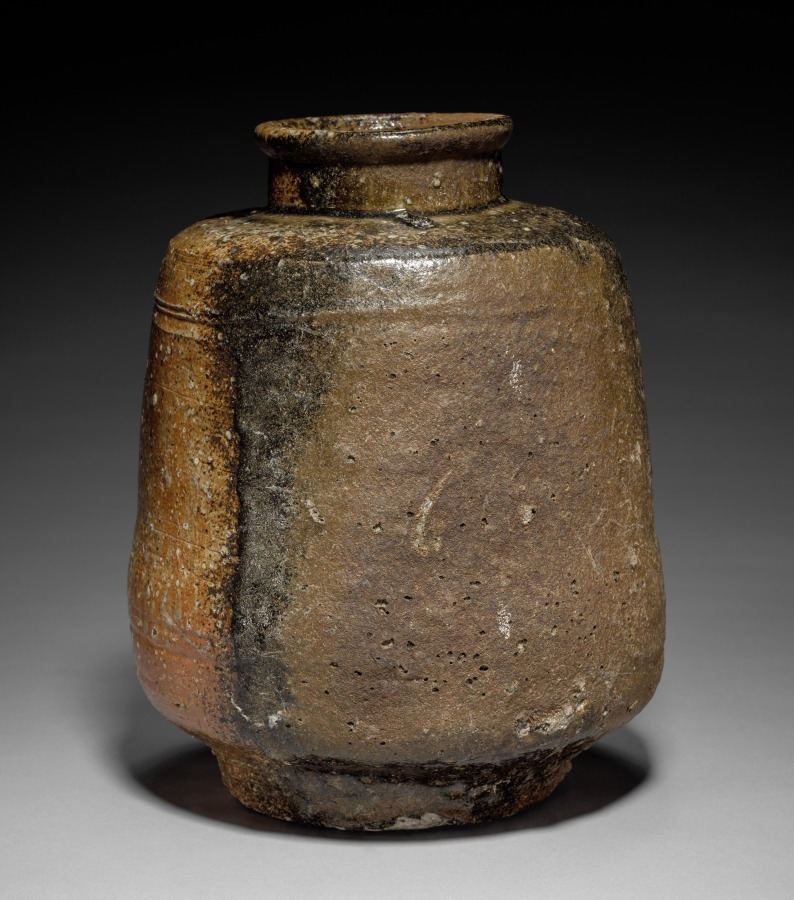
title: Tea Storage Jar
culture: Japan, Momoyama period (1573–1615)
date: 1573–1615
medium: glazed stoneware (Shigaraki ware)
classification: Ceramic